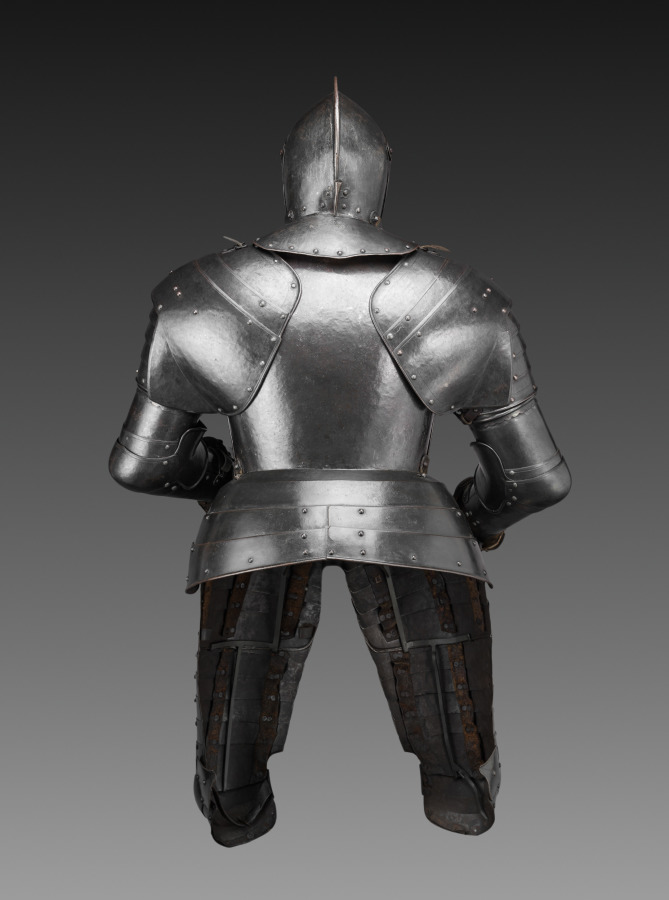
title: Cuirassier's Armor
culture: Austria, Graz(?), early 17th century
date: c. 1600–20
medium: steel (originally blued, now black); leather straps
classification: Arms and Armor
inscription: Proof mark (musket shot) is located on the proper left side of the breastplate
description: The cuirassier was the heavy cavalryman of the late 1500s and early 1600s. Carrying pistols and a sword, he was clad in full armor, like this suit, with the exception of his lower legs, which were protected by heavy riding boots. Shortly after 1650, such heavy cavalry armor disappeared from use. By then, European cavalries had abandoned full armor as impractical against the increased sophistication of firearms. Similar armors survive in the Armory of Graz, Austria.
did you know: This suit of armor is just over 5 1/2 feet tall.